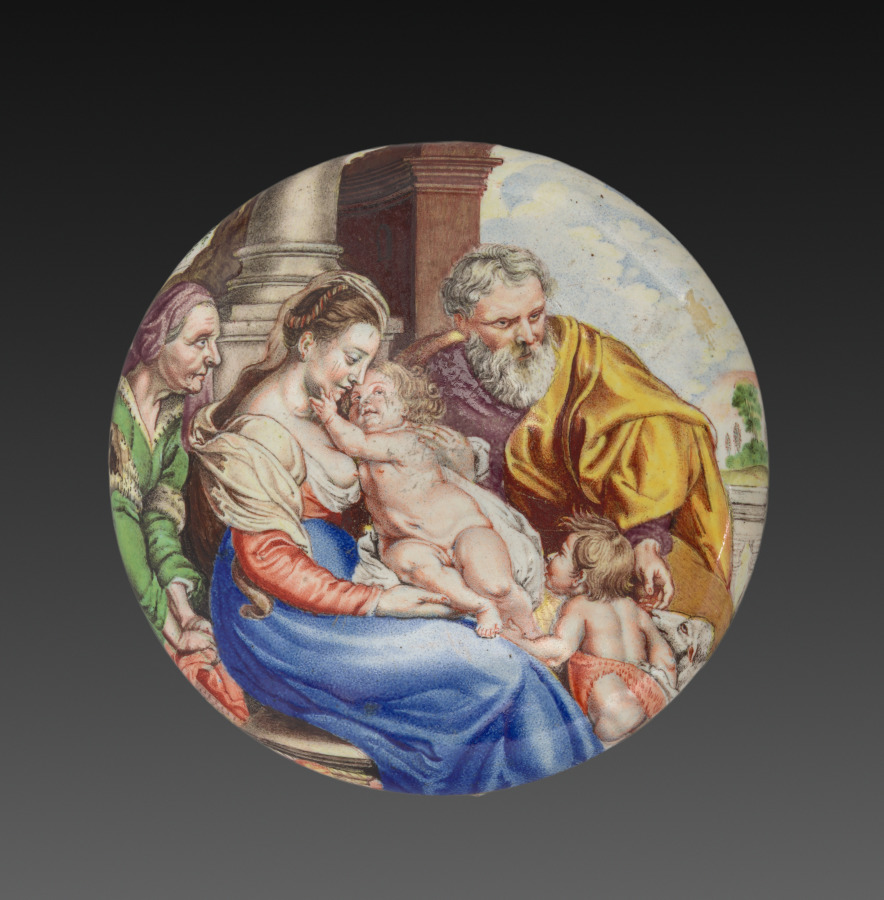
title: Watchcase (Boîtier de montre)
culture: France, 17th century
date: c. 1640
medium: gold and enamel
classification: Jewelry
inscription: [engraved on the rim]: "B8"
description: In the 1630s, the practice of painting with enamel on metal became a means for French miniature painters to achieve a more richly colored, durable product. Previously miniatures were painted with watercolor on vellum, a material made from animal skin. This case would have originally held a watch, but was later transformed into a simple box through the removal of the watch mechanism and ring. This watch case is richly painted inside and out with miniatures modeled after well-known religiously allegorical works.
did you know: Inspiration for the box’s miniatures was drawn from works by Peter Paul Rubens’ The Holy Family with Saints John the Baptist and Elizabeth (1615) (back panel) and Nicolas Cochin (interior base).